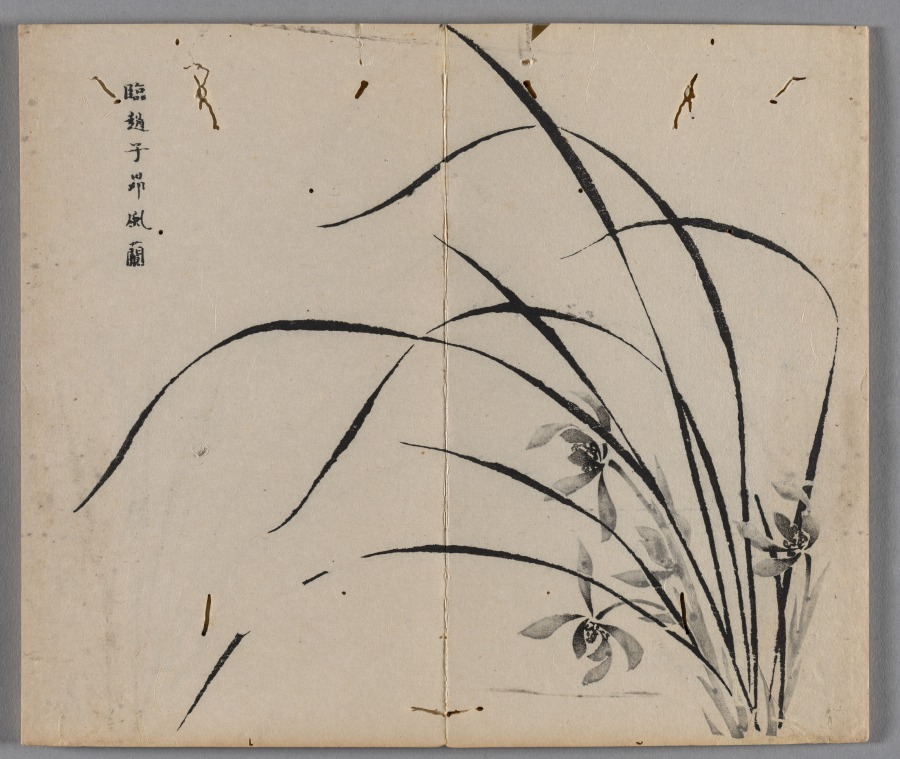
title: Ten Bamboo Studio Painting and Calligraphy Handbook (Shizhuzhai shuhua pu): Orchids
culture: China, Qing dynasty (1644-1911)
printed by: Hu Zhengyan (Chinese, c. 1584–1674)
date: 1633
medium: Woodblock-printed book; ink and colors on paper; first edition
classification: Print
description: Color printing reached a level of perfection in the early 1600s, as seen in this Ten Bamboo Studio Collection of Calligraphy and Painting and the Mustard Seed Garden Manual of Painting (printed 1679 and 1701). The painterly quality, precision in registering (aligning) the woodblocks, and harmonious colors made them the most successful color print editions in Chinese history. Both editions were printed and compiled in Nanjing, spread nationwide, and had a great impact on the arts in Japan and Korea.